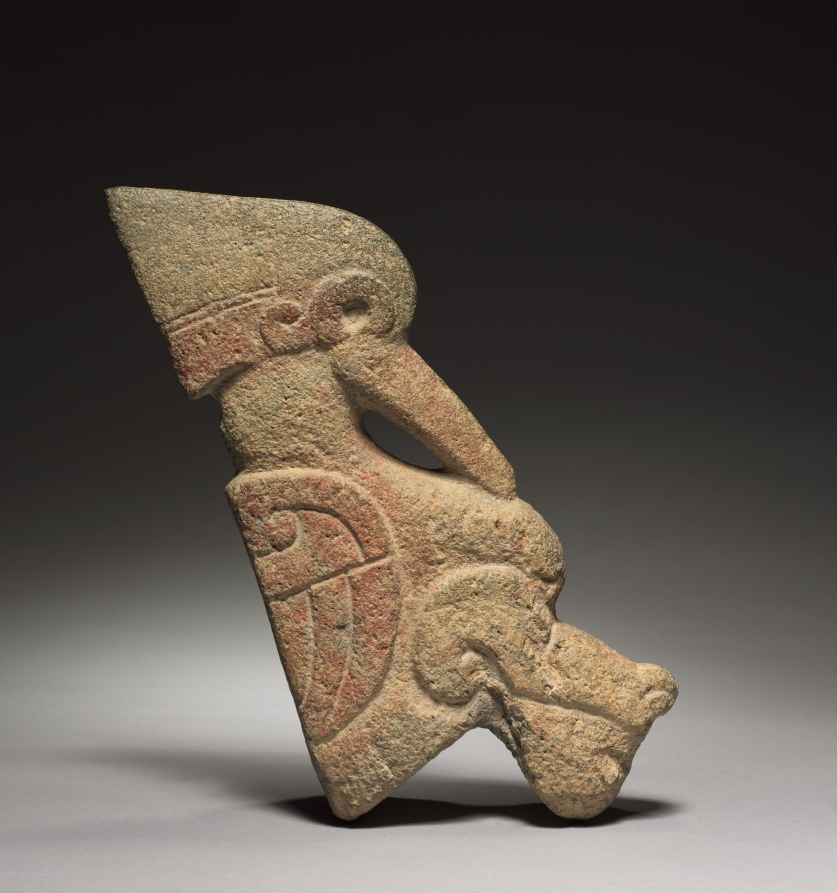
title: Bird Hacha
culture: Mexico, Veracruz, El Tajín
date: 300–900 CE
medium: gray volcanic stone with red pigment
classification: Sculpture